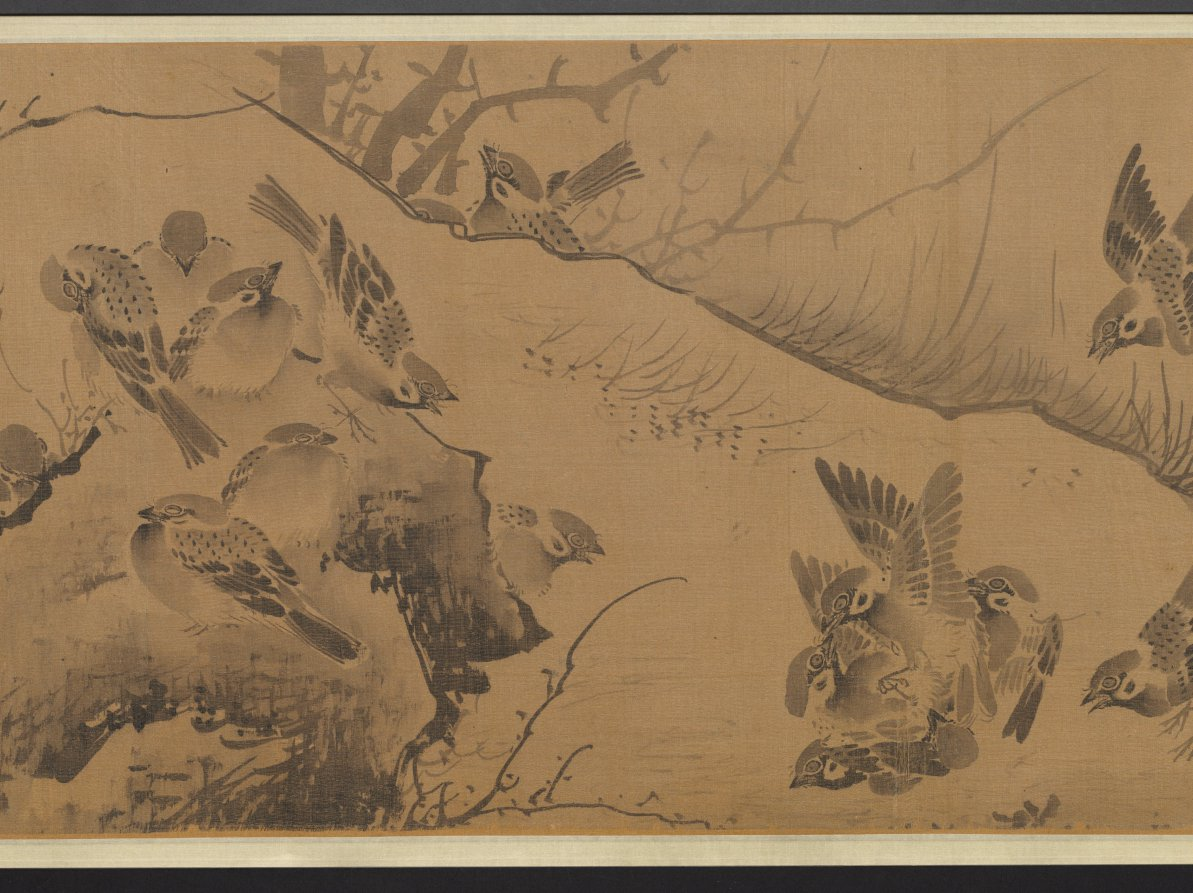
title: A Hundred Sparrows in a Lofty Grove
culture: China, Ming dynasty (1368–1644)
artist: attributed to Lin Liang (Chinese, 1416–1480)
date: 1368–1644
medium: handscroll; ink on silk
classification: Painting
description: Sparrows engaged in all kinds of activities frolic amid leafy branches, blades of grass, rocks, and a waterfall. As our eyes move over the scroll, the artist engages us in enjoying the sparrows’ carefree movements in a natural setting. The charming birds were painted from close observation in swift and fluent brushstrokes. Sparrows are a common bird and in Chinese painting they often represent the commoner in human society as opposed to the noble pheasant or peacock representative of the ruling class.